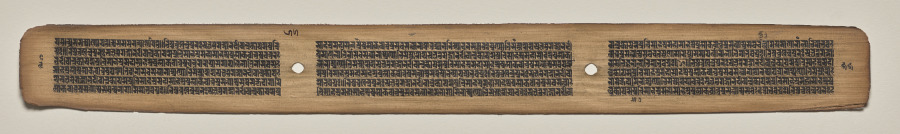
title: Text, Folio 55 (verso), from a Manuscript of the Perfection of Wisdom in Eight Thousand Lines (Ashtasahasrika Prajnaparamita-sutra)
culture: Eastern India, Bihar, Vikramashila Monastery. Painting: Nepal, Kathmandu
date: Sunday, September 14, 1119 (year 239 of the Newar Samvat in the month of Ashvina)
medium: gum tempera and ink on palm leaves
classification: Painting